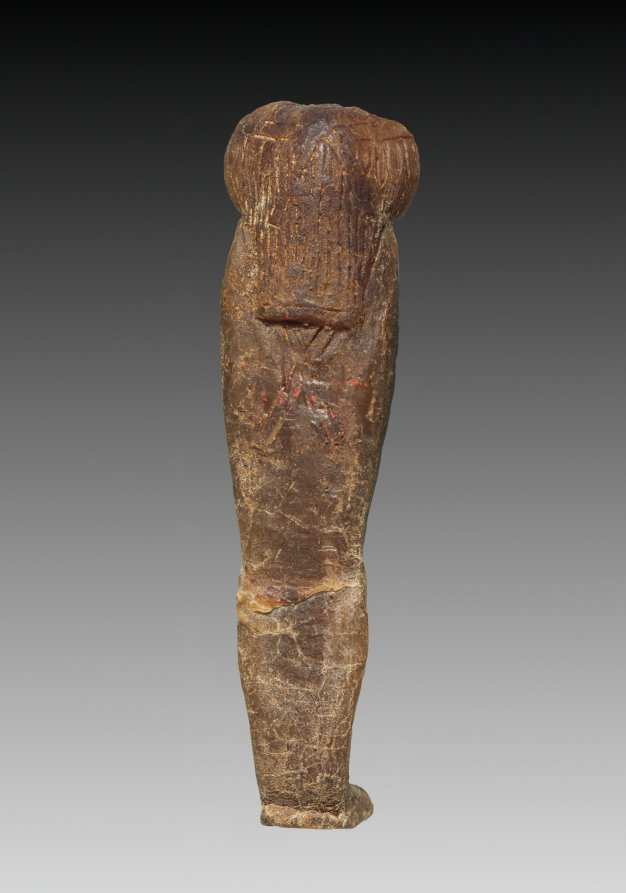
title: Son of Horus: Hapy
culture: Egypt, Third Intermediate (1069–715 BCE), Dynasties 21–22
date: 1000–900 BCE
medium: wax with dark amber varnish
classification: Funerary Equipment